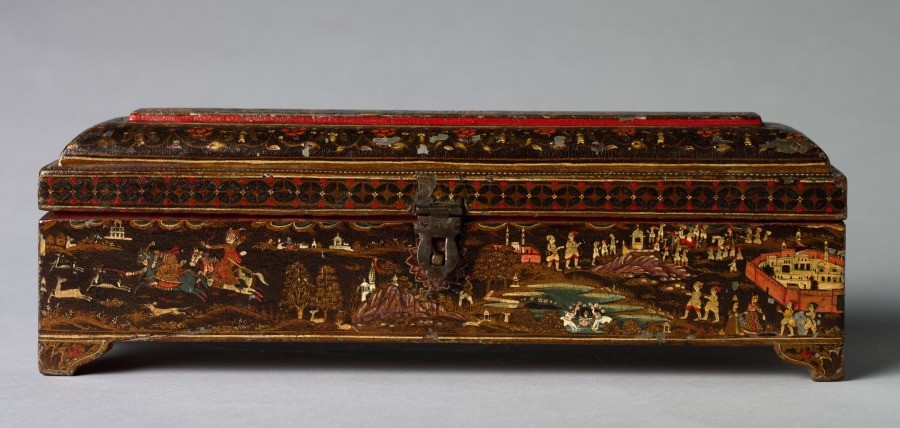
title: Rajput Box with Various Scenes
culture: India, Rajasthan, early 19th Century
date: c. 1800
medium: painted wood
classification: Painting